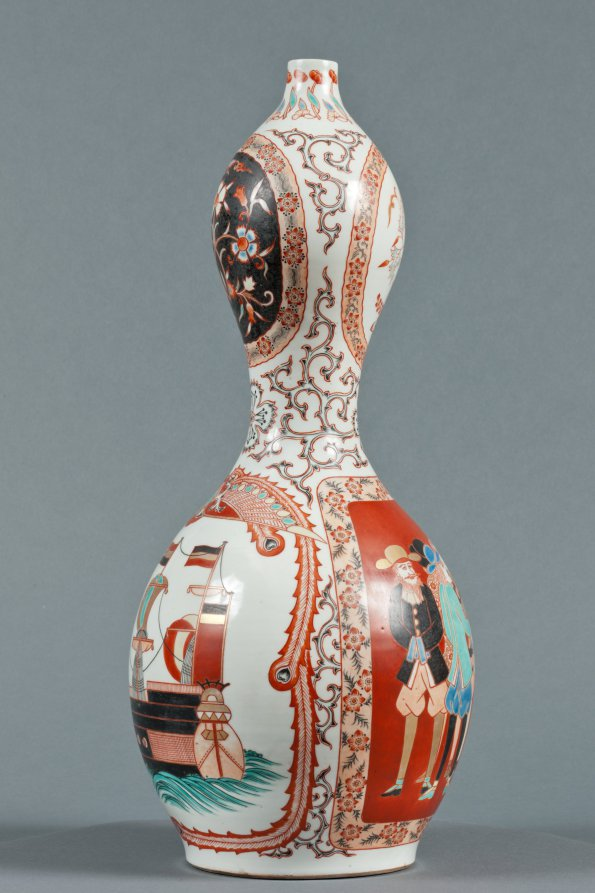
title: Bottle with Western Ships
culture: Japan, Edo period (1615–1868)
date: c. 1800–1868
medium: Porcelain with decoration in colored enamels and underglaze blue, overglaze enamels, and gold (Hizen ware, Arita type)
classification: Ceramic